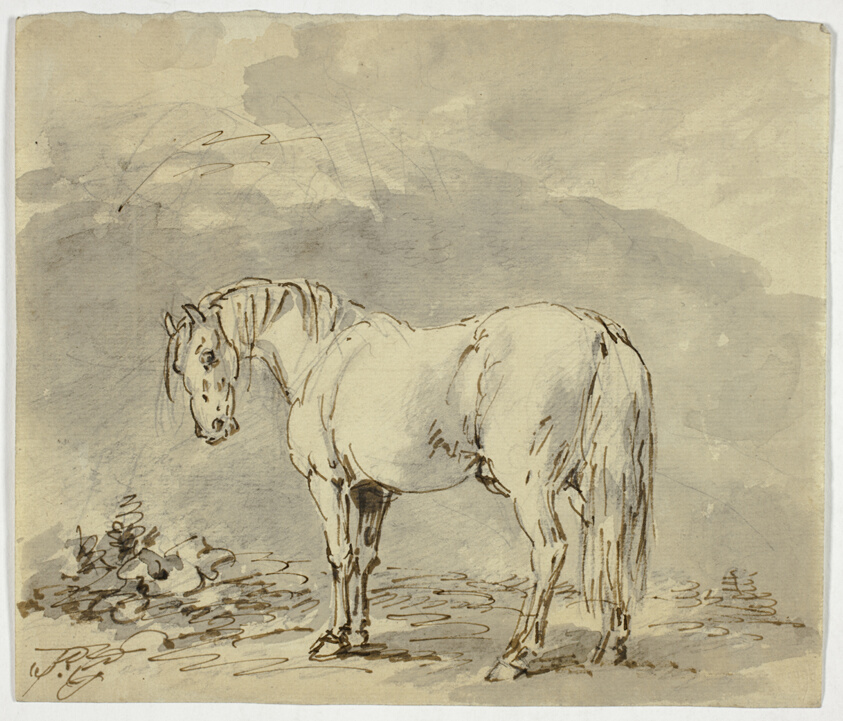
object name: Drawing and Watercolor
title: Standing Horse with Head Turned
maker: Sawrey Gilpin (English, 1733-1807)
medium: Pen and brown ink, with brush and gray and brown wash, over graphite, on ivory laid paper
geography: England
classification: pen and ink drawings; drawings (visual works); prints and drawing; paper